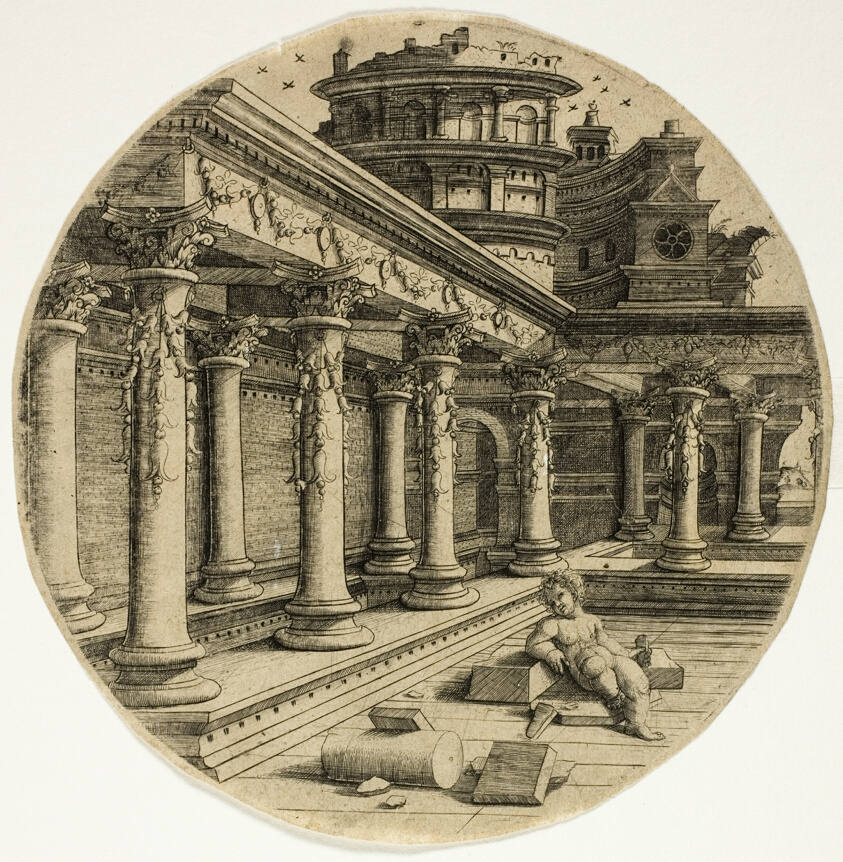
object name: Print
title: The Child in the Courtyard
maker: Jean de Gourmont (French, 1506-1551)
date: 1520/30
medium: Engraving on ivory laid paper (darkened to tan)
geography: France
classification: engraving; print; prints and drawing